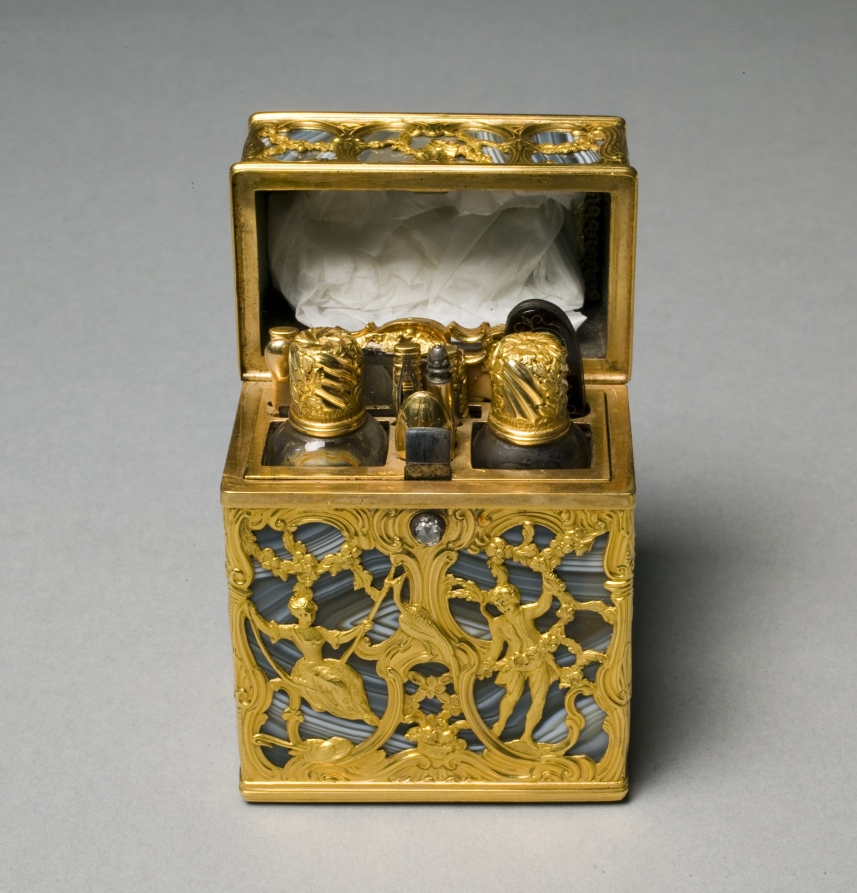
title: Vanity Set (Nécessaire)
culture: England, London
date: c. 1750–60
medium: gold, agate, interior fitted with gold-mounted implements, mirror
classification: Miscellaneous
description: Luxurious personal objects were an essential part of a privileged wardrobe during the 1700s and early 1800s, emphasizing their owner’s refinement and wealth. Jewelry, miniatures, and nécessaires—small expensive sets designed to hold grooming, writing, and sewing tools—were often given as intimate gifts, intended to be seen and admired. Their glittering surfaces, however, disguised a system based on the labor and suffering of enslaved or indentured people, whether in gold and stone mines or shops where these goods were made.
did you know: This small box with a mirror-lined lid is a dressing table accessory that contains luxury objects such as a clasp knife, snuff spoon, tweezers, and scent bottles.